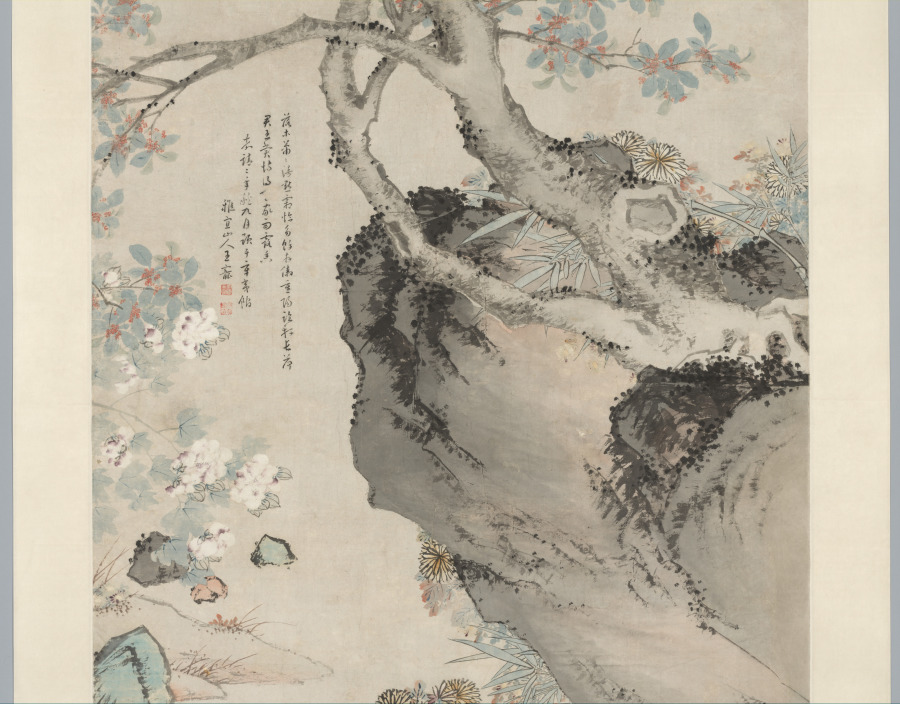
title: Yellow Chrysanthemums and Red Osmanthus in the Style of Wang Yuan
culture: China, Ming dynasty (1368–1644)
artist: Shen Zhou (Chinese, 1427–1509)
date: 1468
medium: hanging scroll, ink on paper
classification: Painting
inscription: Artist's inscription, signature, and 2 seals at upper right: Beneath the fence yellow [chrysanthemum] flowers brave the rain to blossom;/ Still others lean on the red osmanthus tree and dazzle the deep green moss./ With a goblet [of wine] I face them, entirely without concern;/ Who will answer the knocking at the gate where a guest has arrived? In the ninth month of the fourth year of the Chenghua era [1468], I followed the brush-conception of Wang Danxuan 王澹軒 [Wang Yuan 王淵] at the Youzhuzhuang 有竹庄 [House with Bamboo]. Inscribed and [painted] by Shen Zhou 沈周 of Changzhou 長洲. [seals] Shitian 石田; Shen shi Qinan 沈氏启南. trans. HR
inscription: 1 additional inscription, dated 1523, and 2 seals of Wang Chong 王寵 (1494-1533).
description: Shen Zhou, a native from Suzhou, was descended from a prominent land-owning family with strong ties to literati culture. Because Shen Zhou never entered government service, he had ample opportunity to cultivate the arts of painting, poetry, and calligraphy. Chrysanthemums and red osmanthus both bloom in autumn. The deep orange osmanthus flowers emanate a characteristically sweet fragrance. According to his inscription on the painting, Shen Zhou sought to imitate the style of the Yuan dynasty (1271–1368) painter Wang Yuan. His color-filled brushstrokes and washes, however, anticipate the flower painting style of Yun Shouping, whose Peonies are also in the Cleveland Museum of Art collection, https://www.clevelandart.org/art/1967.192. The sheer size and complex composition of this scroll are impressive.